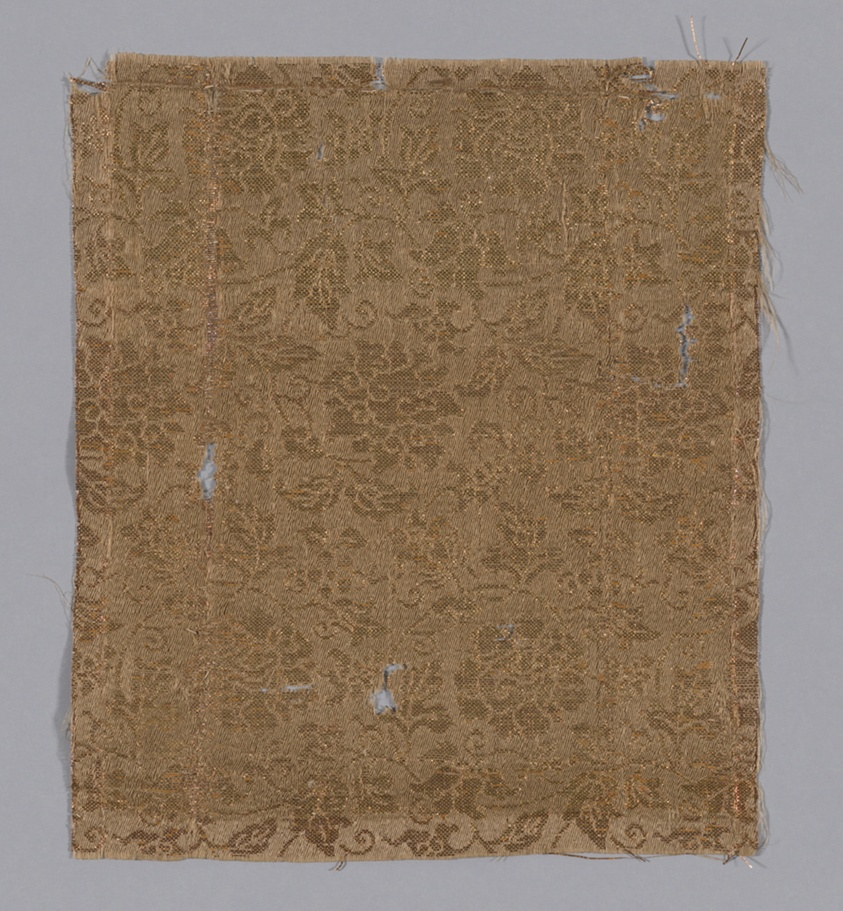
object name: Textile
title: Fragment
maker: Japan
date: Edo period (1615–1868), 17th century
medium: Plain compound twill, silk and gilt paper; 2 1/2 strips to m.m.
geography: Japan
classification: textile; weaving